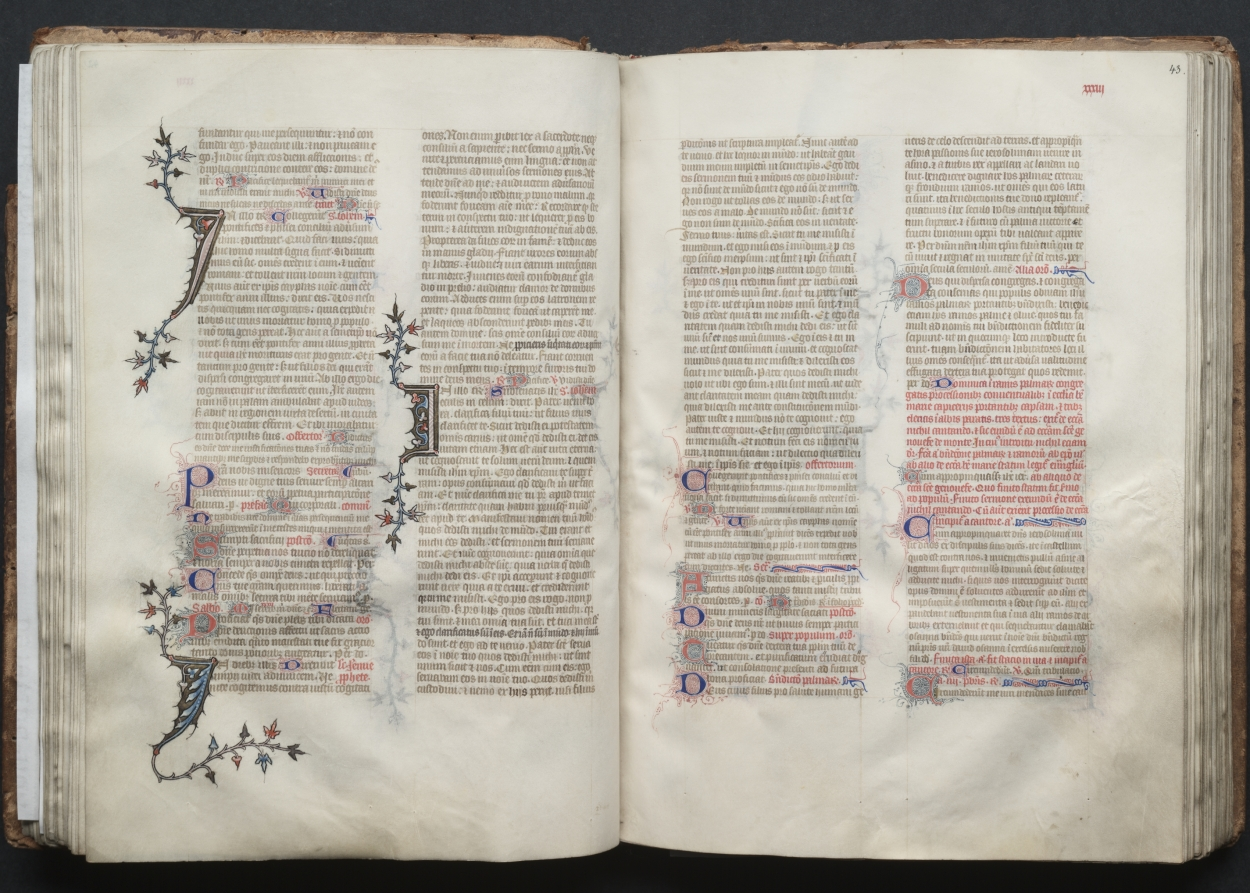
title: The Gotha Missal: Fol. 42v, Text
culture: France, Paris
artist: Master of the Boqueteaux (French)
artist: and Workshop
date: c. 1375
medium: ink, tempera, and gold on vellum; blind-tooled leather binding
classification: Bound Volume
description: The style and quality of this manuscript's decoration is typical of deluxe Parisian books made for aristocratic or royal patrons. Most of the book's decoration appears to be the work of the Master of the Boqueteaux, an artist active at the court of King Charles V (died 1380). His style was apparently shared by a number of book illuminators working in and around Paris. It is very possible that the Gotha Missal belonged to Charles V, but is not provable because the manuscript has no royal portraits and lacks a colophon. Given the book's magnificent decoration, however, it would seem that it was produced for a Valois prince, if not for the king himself. The manuscript receives its name from the German dukes of Gotha, its later owners.